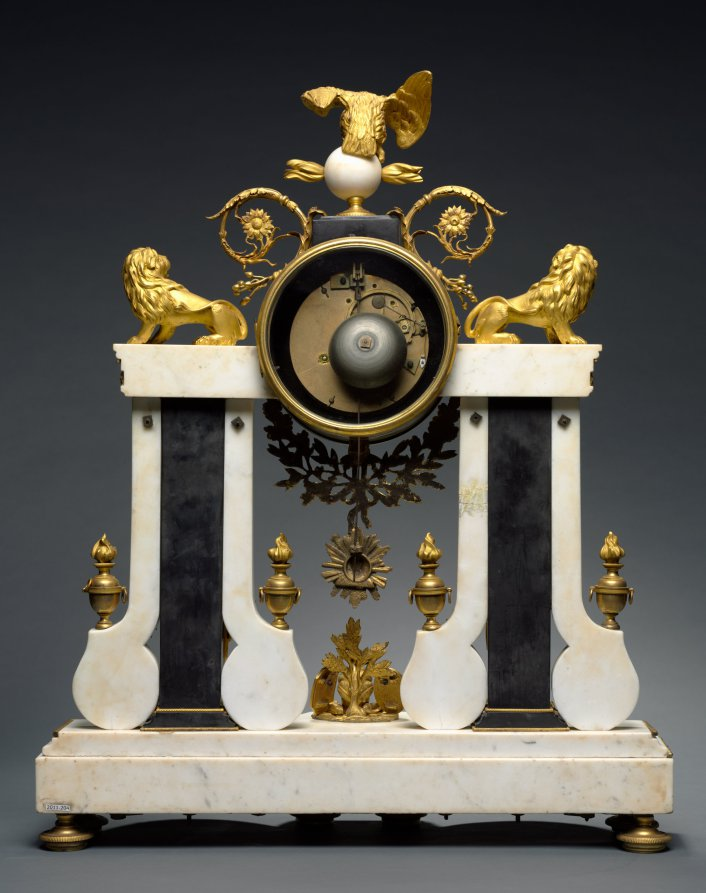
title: Mantel Clock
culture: France, Paris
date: c. 1780–90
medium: marble, gilt-bronze, glass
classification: Stone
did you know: This clock echoes elements of Greek mythology. At left, Athena stands with her helmet on and shield ready. Screen reader support enabled.